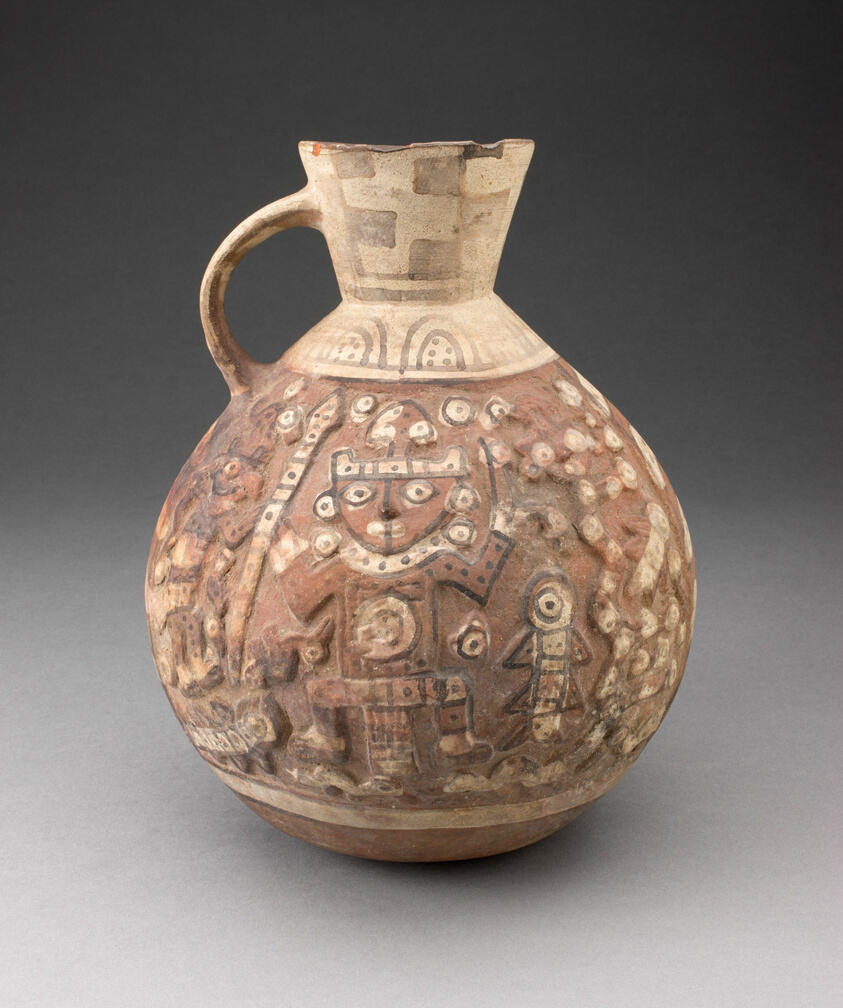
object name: Vessel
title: Handeled Jar with Painted Relief Depicting Figure with Animals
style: tiahuanaco, middle horizon, Pre-Columbian, americas, lambayeque, late intermediate period, Arts of the Americas, andean, andes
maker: Lambayeque or Tiwanaku; Central or north coast, Peru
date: 1000–1476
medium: Ceramic and pigment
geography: Peru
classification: earthenware; ceramics; vessel; art of the americas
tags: super/natural